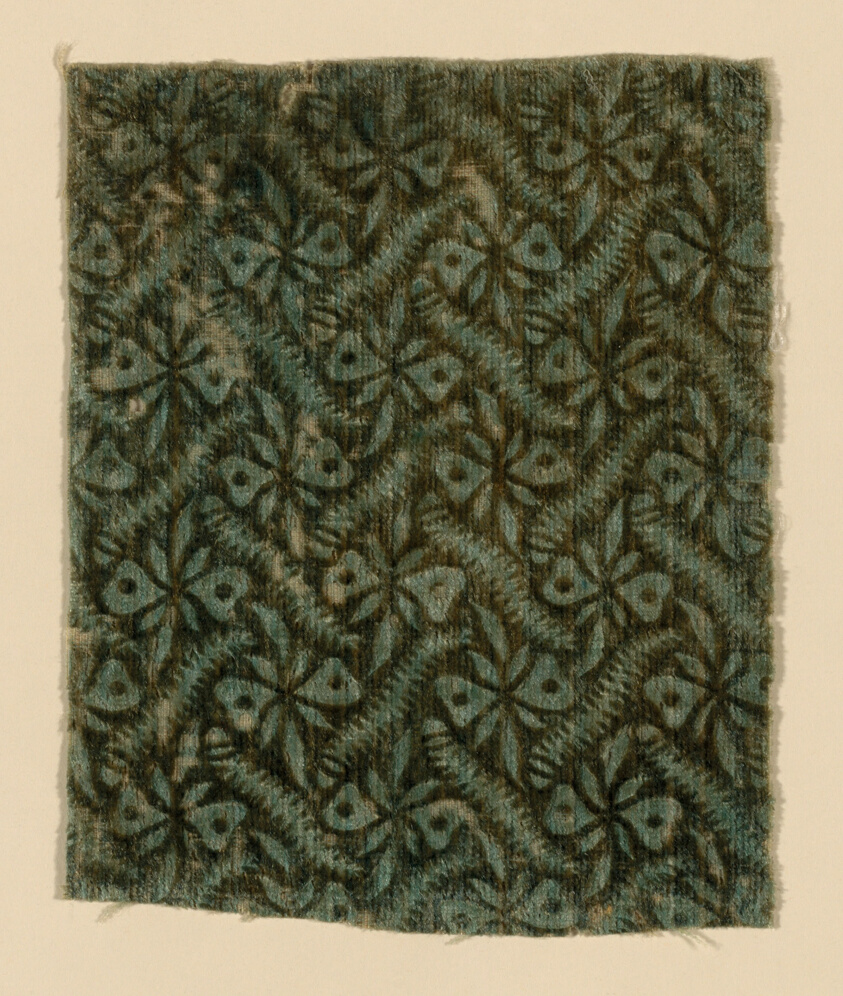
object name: Textile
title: Fragment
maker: Italy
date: 17th century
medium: Wool, plain weave with supplementary pile warps forming cut, solid velvet; stamped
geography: Italy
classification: textile; weaving - velvet